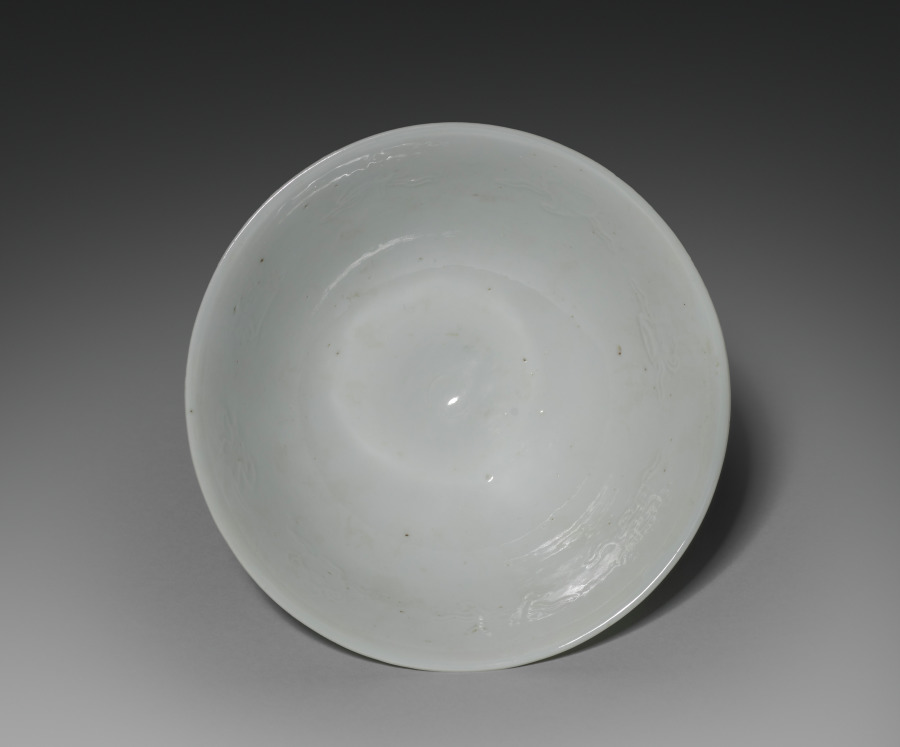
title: Stem Cup with Buddhist Emblems: Shufu Ware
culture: China, Jiangxi province, Yuan dynasty (1271-1368)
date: 1300s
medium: porcelain with molded decoration and white glaze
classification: Ceramic